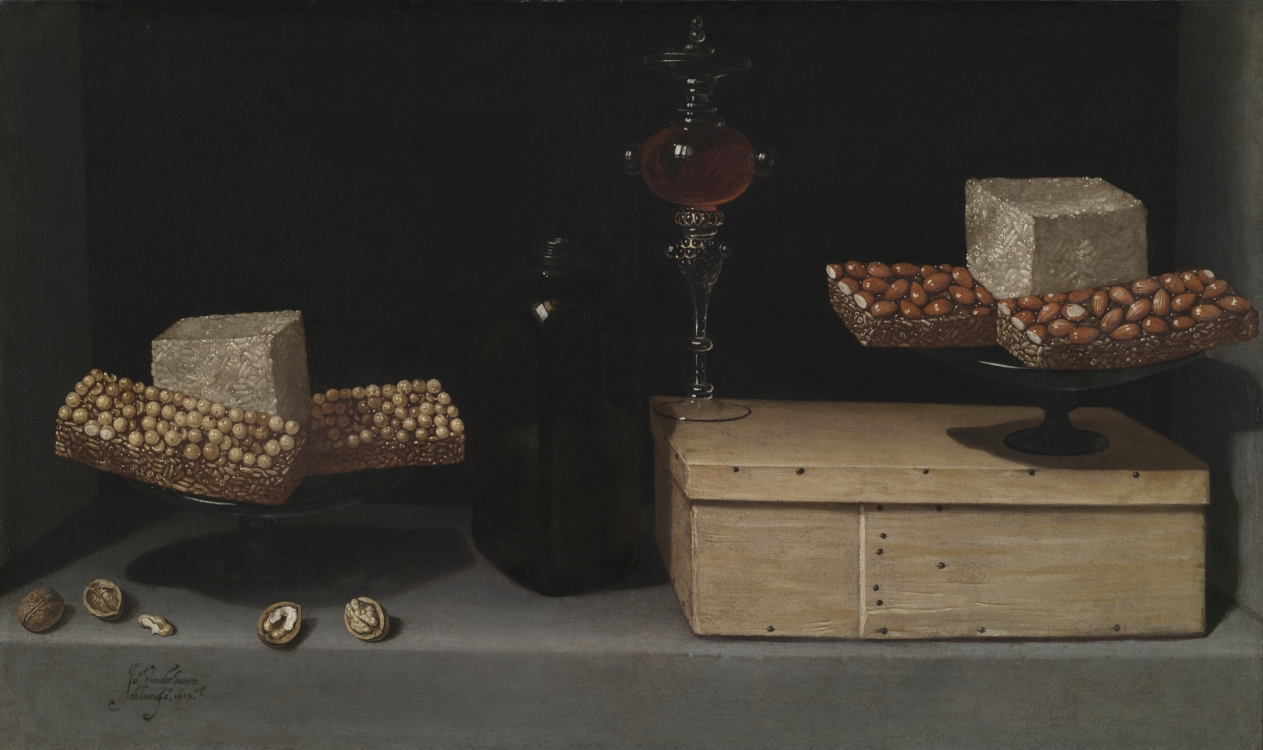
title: Still Life with Sweets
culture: Spain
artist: Juan van der Hamen y Léon (Spanish, 1596–1631)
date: 1622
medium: oil on canvas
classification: Painting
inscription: Signed lower left: "Ju Vander Hamen/ de Leon fa[t], 1622"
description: Placed on a simple stone ledge, this bold arrangement includes a wooden box, a dark glass bottle, some walnuts, an elaborate Venetian glass, and several sweets called turrones. These delicacies are a mixture of pine nuts, honey, almonds, and hazelnuts. The picture may not represent an actual meal or snack. Rather, the artist played with contrasts and harmonies of shapes, textures, and colors. During his short career van der Hamen, whose father was from the Netherlands, worked at the Spanish royal court and created biblical pictures, history paintings, allegories, and landscapes. He is best known for his portraits and still lifes.